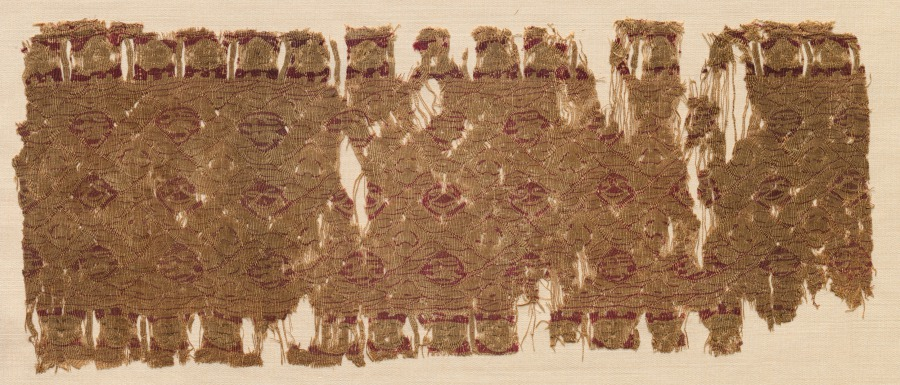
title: Fragment of a Tiraz-Style Textile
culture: Egypt, Fatimid period, Caliphate of al-Hafiz, AH 524-544 (A.D. 1130-1149)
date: 1130 – 1149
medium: tapestry (originally inwoven in a tabby ground); linen and silk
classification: Textile